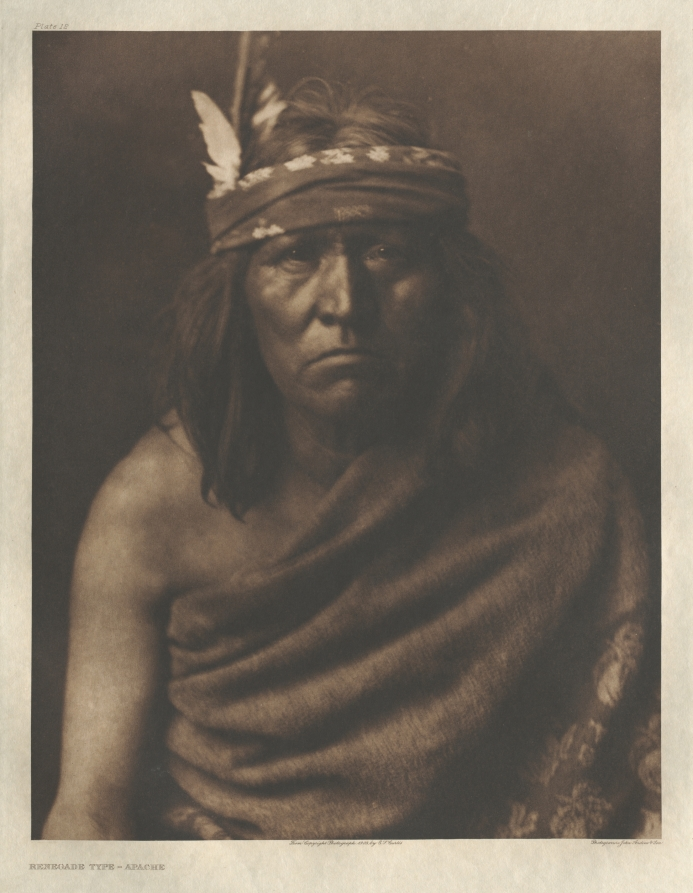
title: Portfolio I, Plate 12: Renegade Type-Apache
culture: America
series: The North American Indian: being a series of Portfolios picturing and describing the Indians of the United States, the Dominion of Canada, and Alaska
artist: Edward S. Curtis (American, 1868–1952)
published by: The University Press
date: 1903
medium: photogravure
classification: Portfolio